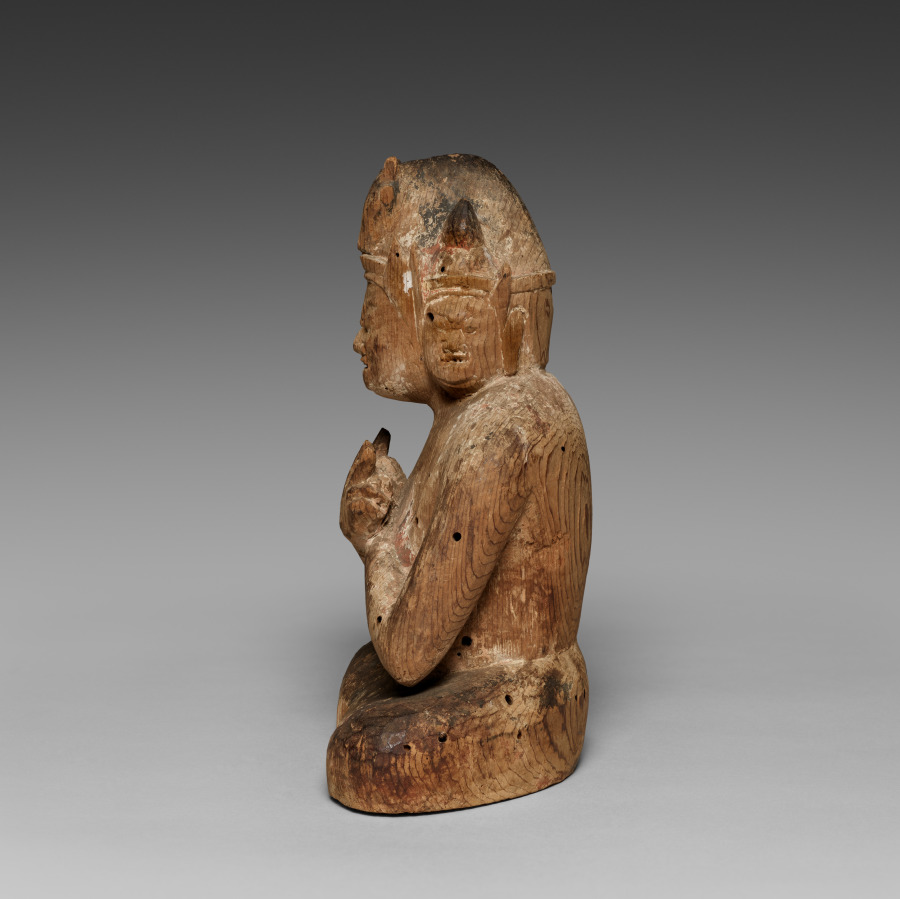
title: Gozu Tennō (Ox-Headed Plague Deity)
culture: Japan, Heian period (794–1185)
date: 1100s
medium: Wood with traces of color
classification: Sculpture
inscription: Object has wood storage box made and inscribed by former owner, sculptor Hirakushi Denchū (1872–1979). Inscription on face of box lid reads: Gozu Tennō sonzō (sculpture of Gozu Tennō [Ox-Headed Deity of Plague] 牛頭天王尊像); inscription on inside of box lid reads: made in the latter part of the Heian period, respectfully inscribed by Hirakushi Denchū [age] 99, February 1970 (平安朝後期作昭和四十五年二月 九十九 平櫛田中 拝題）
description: Gozu Tennō is a deity who is capable of both bringing epidemics and dispelling them. His name is literally “Ox-Headed Celestial King.” He usually has three heads with an ox-head rising above his primary face. He sometimes holds a lasso and sword or an ax, but here holds his hands in a powerful gesture that may be designed to repel illness or promote healing.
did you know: The Gion Festival in Kyoto is related to belief in Gozu Tennō.